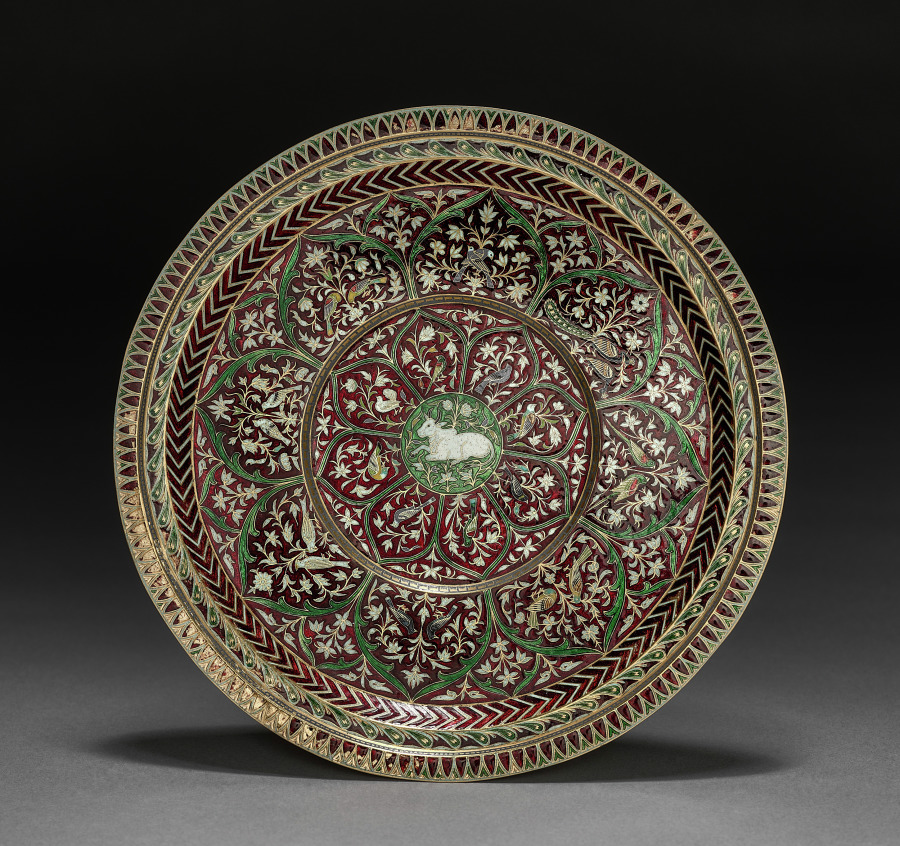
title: Plate with Nandi in Center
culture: Northwestern India, Rajasthan, Rajput Kingdom of Jaipur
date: c. 1800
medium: cloisonné enamel on gold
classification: Enamel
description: Petal-shaped canopies filled with floral designs and birds encircle an image of Nandi, the white bull mount of the Hindu destroyer god Shiva. Together they form a lotus flower. The birds are individualized species, showing the care of the metalworker to depict nature in all its variety and splendor. The fowl include peacocks, parakeets, bluebirds, and possibly even Indian rollers. To make the birds’ wings and the details on Nandi, the artist used thin gold wire to create cells, called cloisons, that could then be filled with colored glass. Some of the red glass has been lost on the outer rim of the plate.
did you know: A peacock and peahen inhabit the upper right corner.